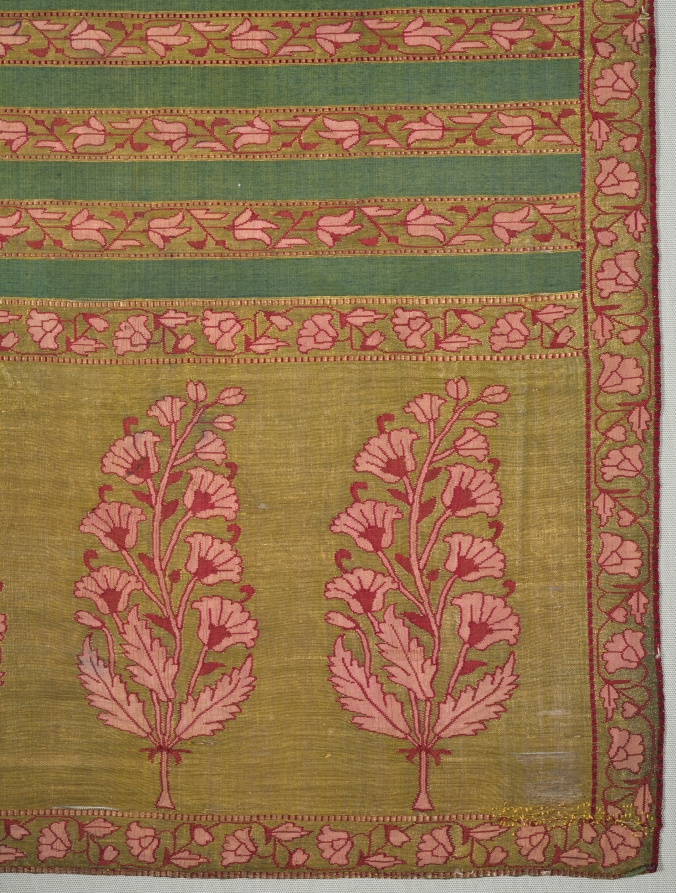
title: Sash with flora and banded field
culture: India, probably Aurangabad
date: 1700s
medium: tapestry weave, double interlocked: silk and gilt-metal thread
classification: Textile